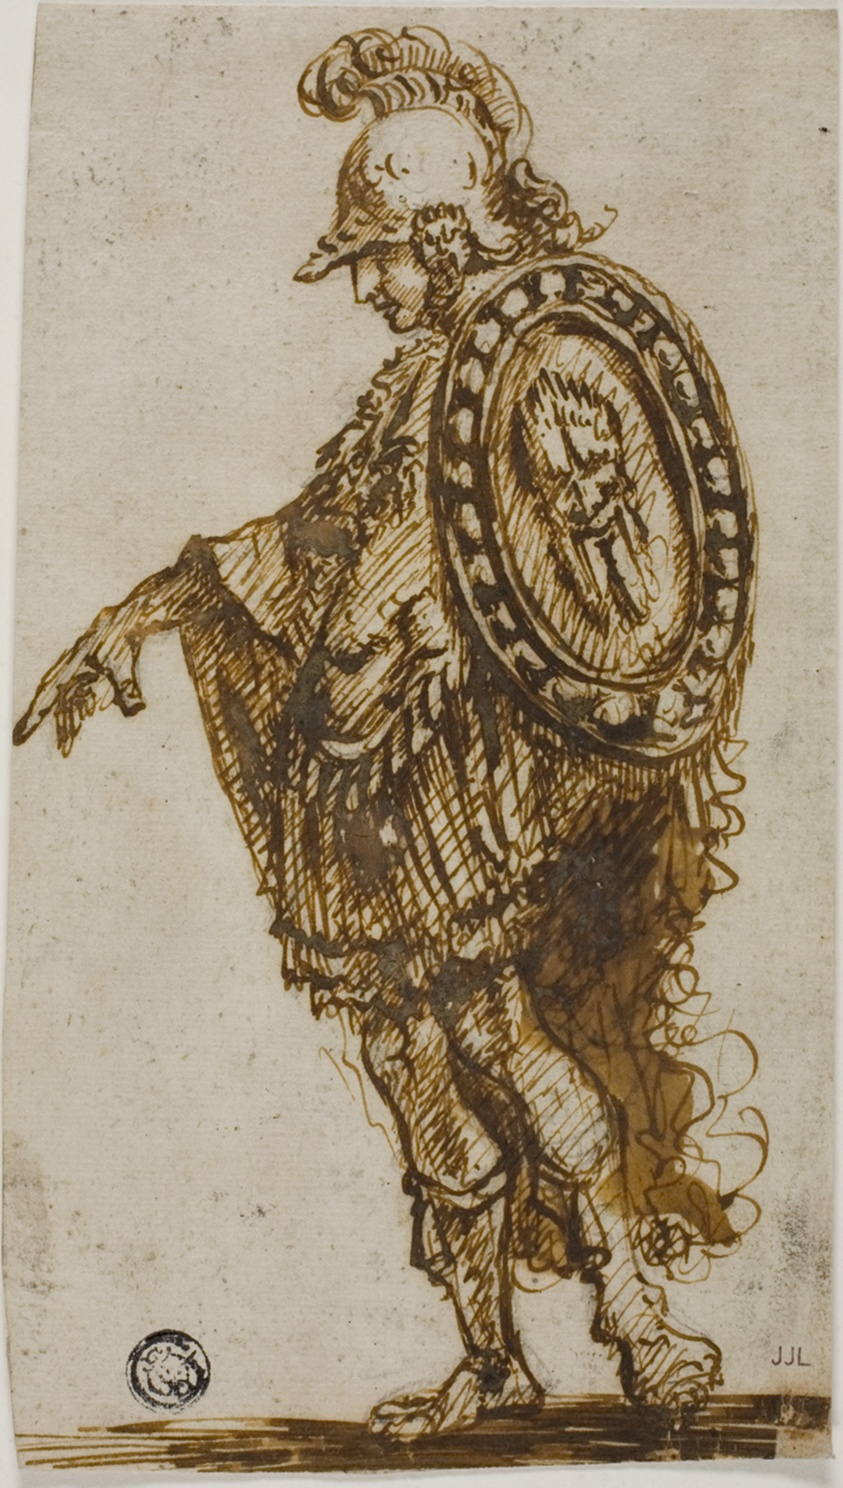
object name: Drawing and Watercolor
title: Standing Warrior with Shield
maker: Attributed to Stefano della Bella; Italian, 1610-1664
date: 1750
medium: Pen and brown ink, with brush and brown wash, over traces of graphite, on ivory laid paper, laid down on ivory laid paper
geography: Italy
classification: pen and ink drawings; drawings (visual works); prints and drawing